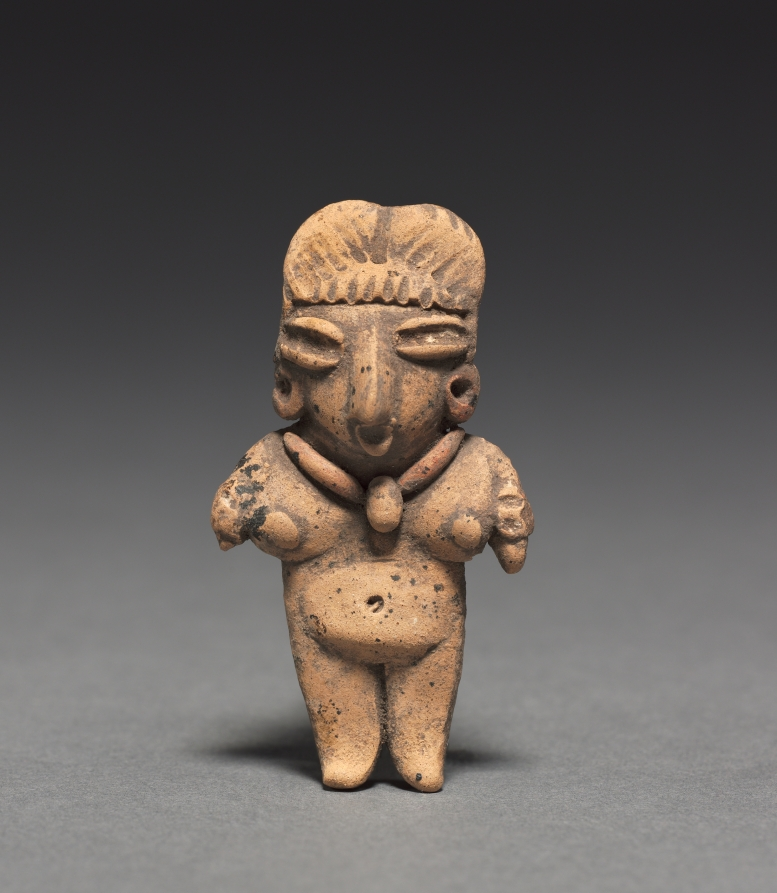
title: Female Figurine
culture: Mexico, Chupíuaro, Guanajuato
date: 400–100 BCE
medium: pottery with traces of white pigment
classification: Sculpture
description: The Chupícuaro culture, located north of Mexico City in the state of Guanajuato, created a distinctive ceramic tradition including small clay figurines. This example is said to belong to a group of ten figurines from the same burial or cache (1990.145–154). The group includes both males and females that can be sorted into couples based on size.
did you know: Groups of figurines were sometimes arranged in scenes and likely used in household rituals.